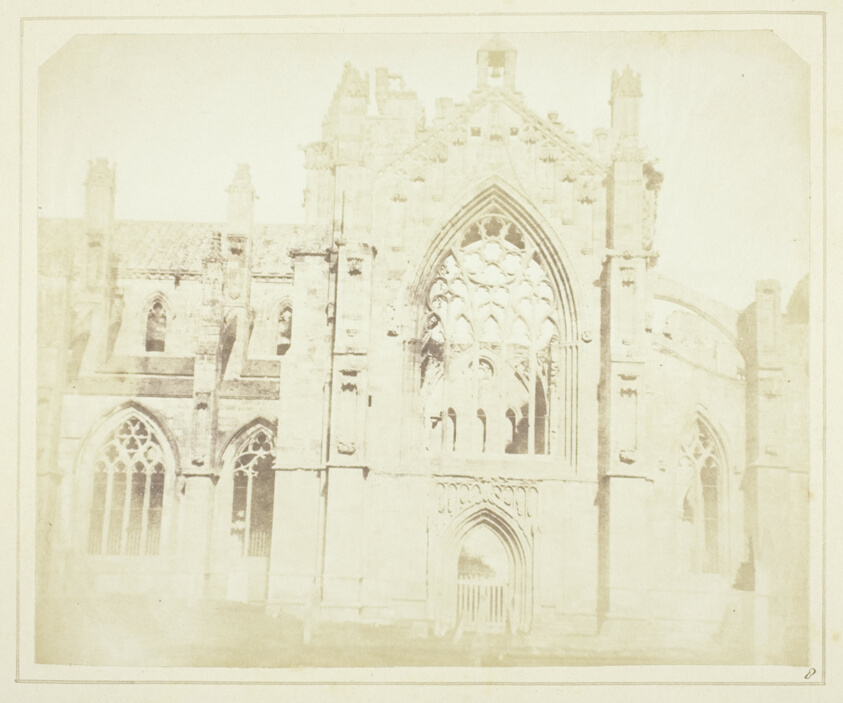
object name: Photograph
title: Melrose Abbey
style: 19th century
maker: William Henry Fox Talbot (English, 1800–1877)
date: 1844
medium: Salted paper print, plate VIII from the album "Sun Pictures in Scotland" (1845)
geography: England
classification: salted paper print; photographic process; photography; photograph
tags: Collected by Hugh Edwards